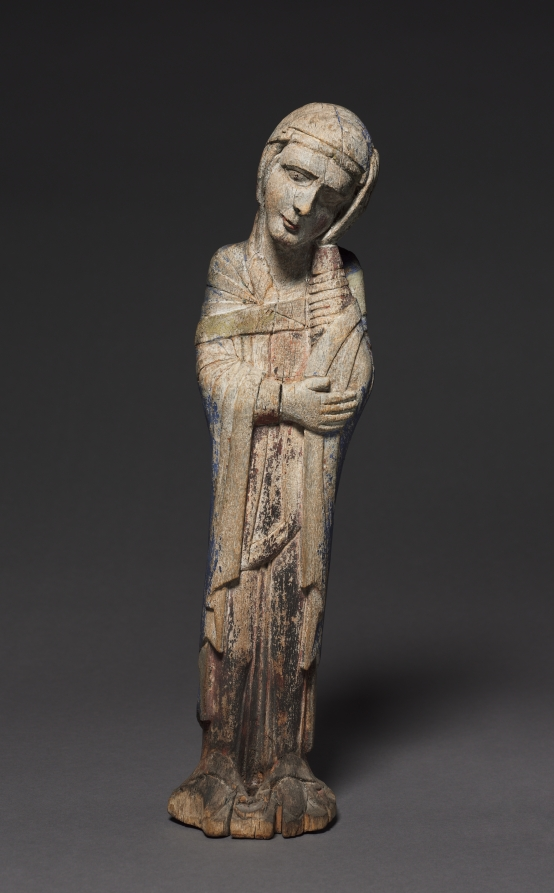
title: Mourning Virgin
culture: Austria, Region of Salzburg, Lungau?, 13th century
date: c. 1240–1260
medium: painted wood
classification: Sculpture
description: These traditional devotional figures at one time formed a Crucifixion group with a Crucified Christ (now lost). The ensemble may have been mounted high above the entrance to the sanctuary of a church on a barrier called a rood beam, beyond which lay people were not allowed. Crucifixion groups were common in medieval churches where they symbolized the sacrifice and real presence of Christ in the Mass.